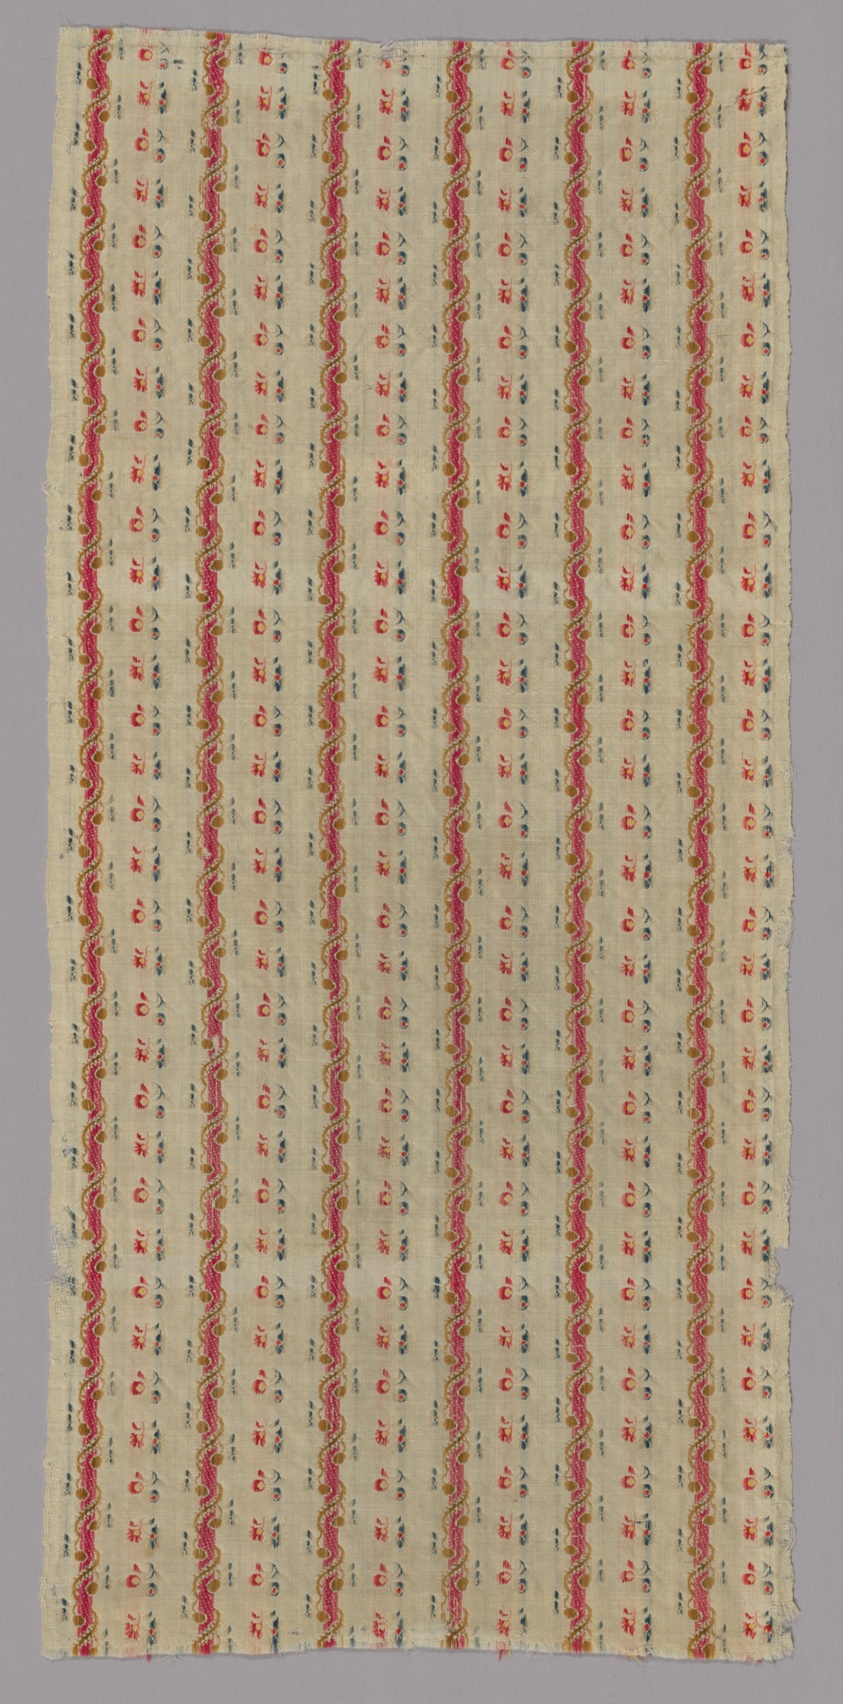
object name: Textile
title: Panel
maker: England or France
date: 18th century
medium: Wool, plain weave with supplementary patterning warps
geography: England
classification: textile; weaving; furnishing textile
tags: flowers